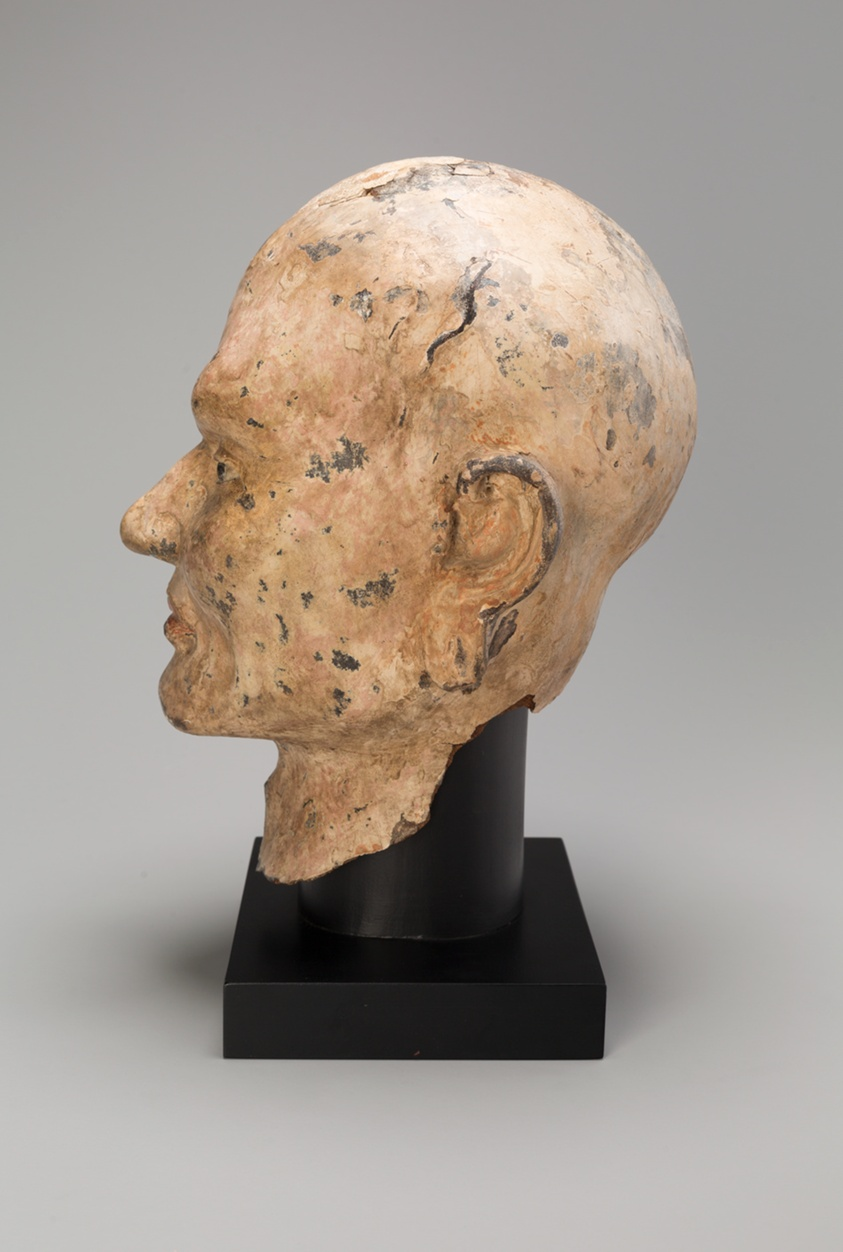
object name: Sculpture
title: Head of Luohan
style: Chinese (culture or style)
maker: China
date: Northern Song, Liao, or Jin dynasty, c. 11th century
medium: Hollow dry lacquer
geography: China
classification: lacquer; sculpture; asian art